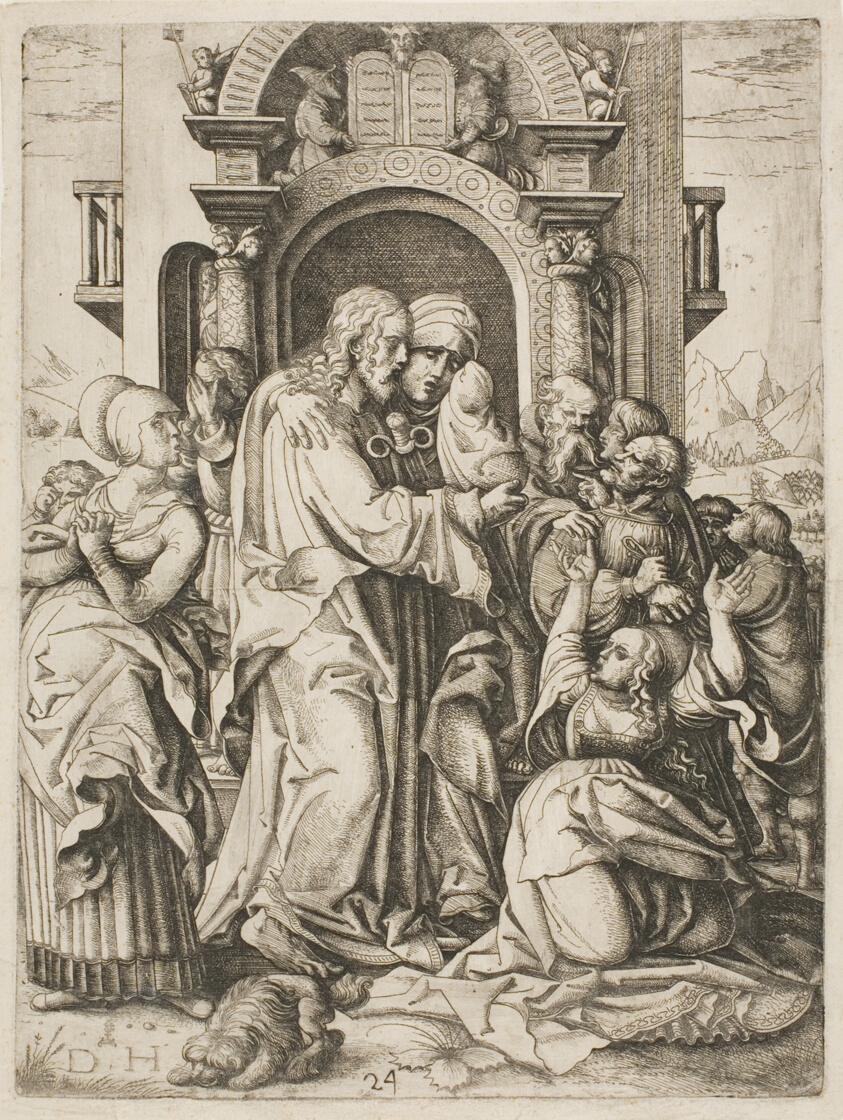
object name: Print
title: Jesus Christ Parting from the Virgin to go and Suffer Death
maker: Daniel Hopfer, I (German, 1470-1536)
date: 1505/36; printed 1682/1709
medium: Etching in black on cream laid paper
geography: Germany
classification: etching; print; prints and drawing